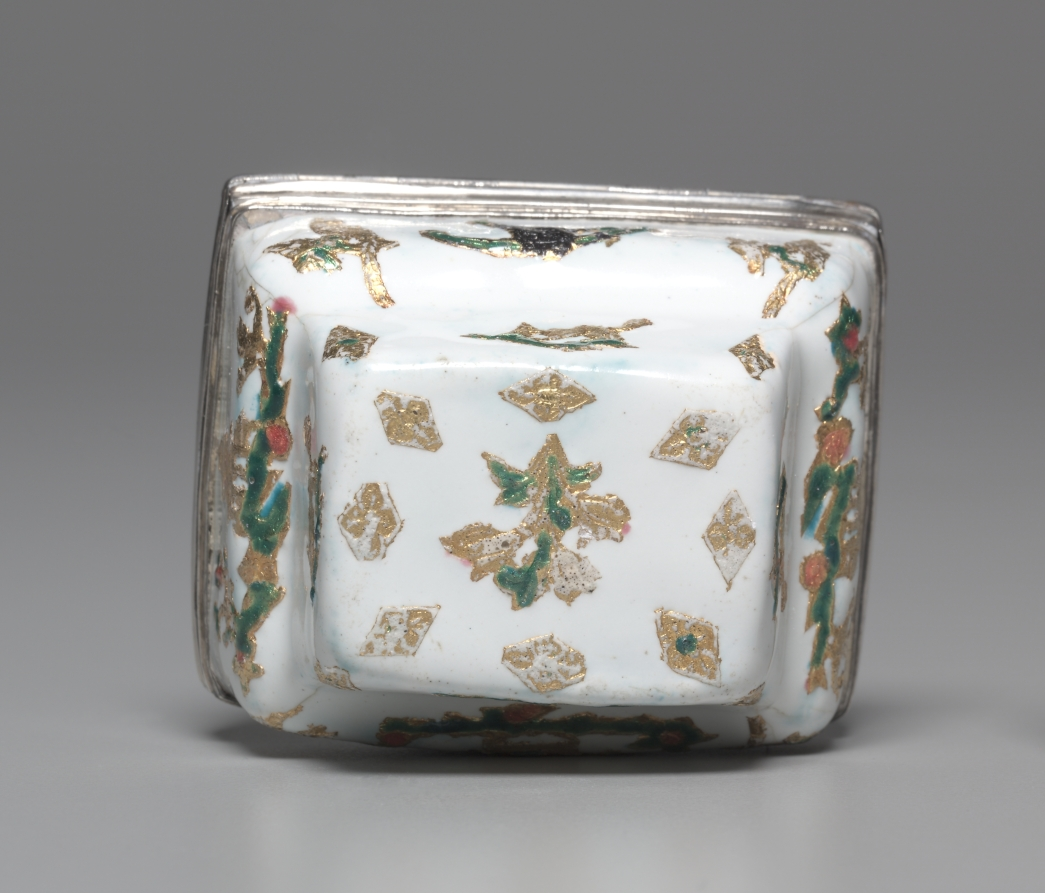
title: Box (Boîte)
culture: possibly France, mid-18th century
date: 1730–40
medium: enamel and gold leaf on copper mounted in silver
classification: Miscellaneous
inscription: [Traces of marks on mounts, too rubbed to be legible. One has previously been identified as possibly a French discharge mark of middle-18th century (Beuque 669 or 687). Maybe the discharge mark for small work of Hubert Louvet, Paris, 1732-38, left side of rim.]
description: Chinoiserie in 18th-century France incorporated imitations of East Asian motifs, designs, and ornaments into European art. These imitations were often distorted by the European imagination and were not accurate representations of the cultures from which they drew inspiration. Motifs typical of chinoiserie can be seen in this box’s floral patterns and repeated representations of pagodas, dragons, and peacocks.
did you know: The depictions of various animals and plants on this box have been covered in a very thin layer of gold called gold leaf.